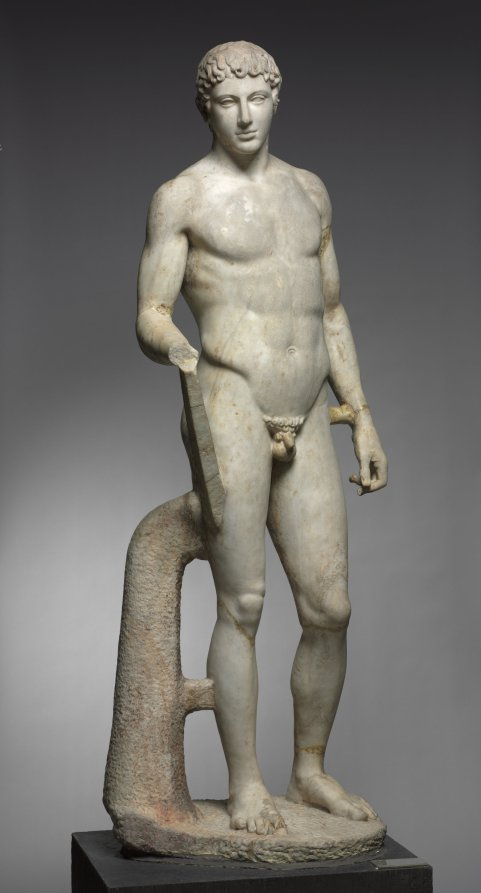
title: Statue of an Athlete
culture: Italy, Roman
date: 1–100 CE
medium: marble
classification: Sculpture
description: This idealized athlete recalls Greek sculptural types invented and popularized during the 400s BC. Large-scale athletes and other sculptures like this were originally created by famous artists as sanctuary dedications. Centuries later, they were widely copied and adapted by Roman sculptors, whose clients sought their own versions of earlier masterpieces. Working in marble rather than bronze, these sculptors added certain elements for stability, such as the struts and the large tree trunk beside the right leg here. Sculptures like this one are profoundly complex, made by and for Romans but descended from Greek ancestors.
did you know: For many years, this sculpture stood in the rotunda of the Cleveland Museum of Art.